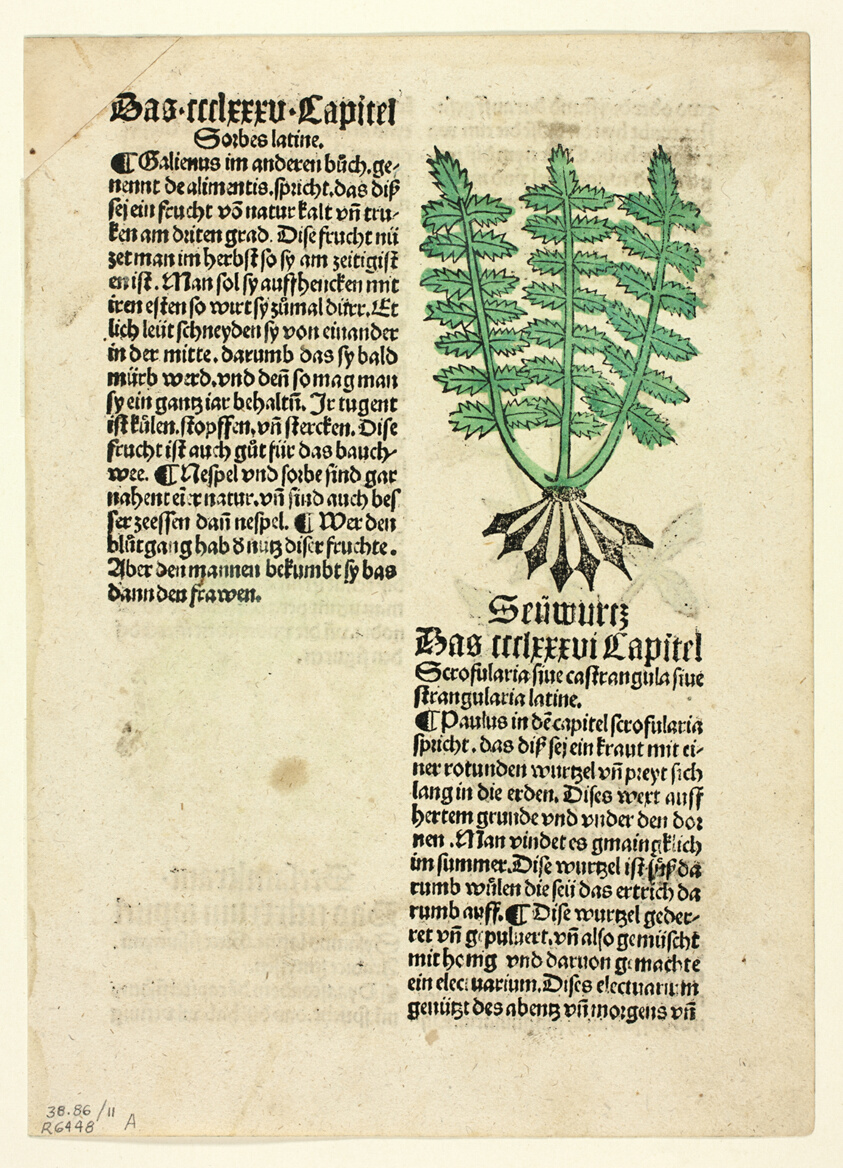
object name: Print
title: Figwort (recto), and Bloodroot (verso), from Gart der Gesundheit (Garden of Health), Plate 11 from Woodcuts from Books of the 15th Century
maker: Unknown Artist (Augsburg, 15th century); printed and published by Johann Schönsperger the Elder (German, c. 1455–1521); original text by Johann Wonnecke von Cube (German, c. 1430–1503); portfolio text by Wilhelm Ludwig Schreiber (German, 1855–1932)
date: c. 1499, portfolio assembled 1929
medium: Woodcut in black with hand-colored additions and letterpress in black (recto and verso) on cream laid paper, tipped onto cream wove paper mat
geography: Germany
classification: woodcut; print; prints and drawing